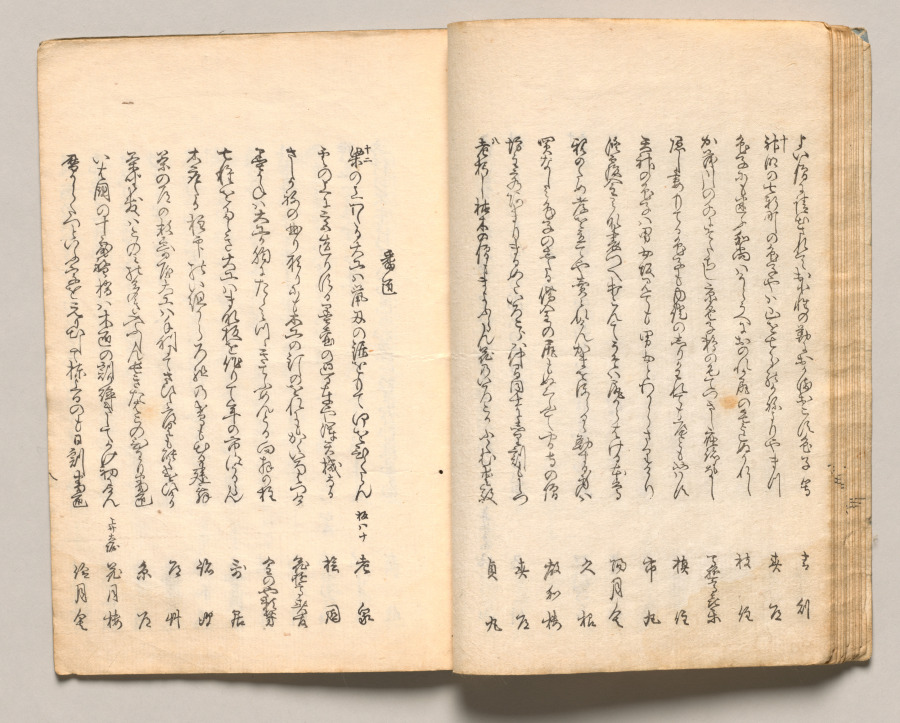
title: Spread Fifteen from Volume Two of People of Japan in Light Verse (Kyōka)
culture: Japan, Edo period (1615–1868)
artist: Utagawa Hiroshige (Japanese, 1797–1858)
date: 1857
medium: Woodblock-printed book; ink and color on paper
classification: Bound Volume